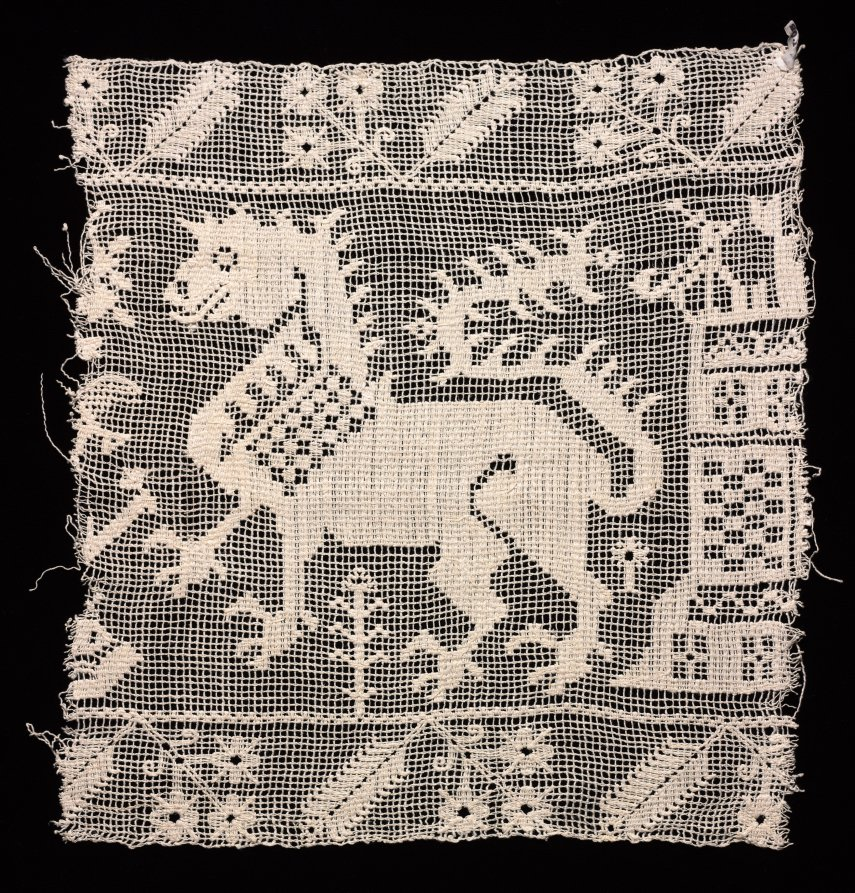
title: Fragment of a Band with Dragon, Castle, and Vegetation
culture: Italy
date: 1500s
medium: Bleached linen (est.): needle lace, burato (twined ground and darned in one direction)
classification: Lace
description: The detailed and elegant craftsmanship of this piece of lace clearly delineates the dragon, with its extended tongue, pointy scales along its neck and tail, and clawed feet. To its right is an architectural element, most likely a castle.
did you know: This piece has a counterpart at the Metropolitan Museum of Art, New York (20.186.359).